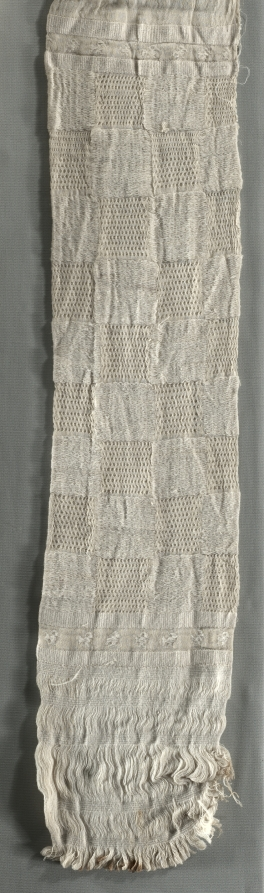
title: Loincloth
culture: Peru, North Coast, Chimú style, 1200–1460s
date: 1425–1500 (radiocarbon date, 92.3% probability)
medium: cotton; plain weave, brocaded and complex alternating gauze with 5 shots of plain weave between gauze shots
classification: Garment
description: Loincloths were basic men’s wear in ancient Peru. But the extraordinary size of some examples—this one is about eight feet long, unfolded—makes it difficult to know how they were worn, except that they were tied around the waist with the decorated panels hanging at the front and back of the body. The appearance may have been that of a billowing skirt.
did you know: This loincloth is huge!